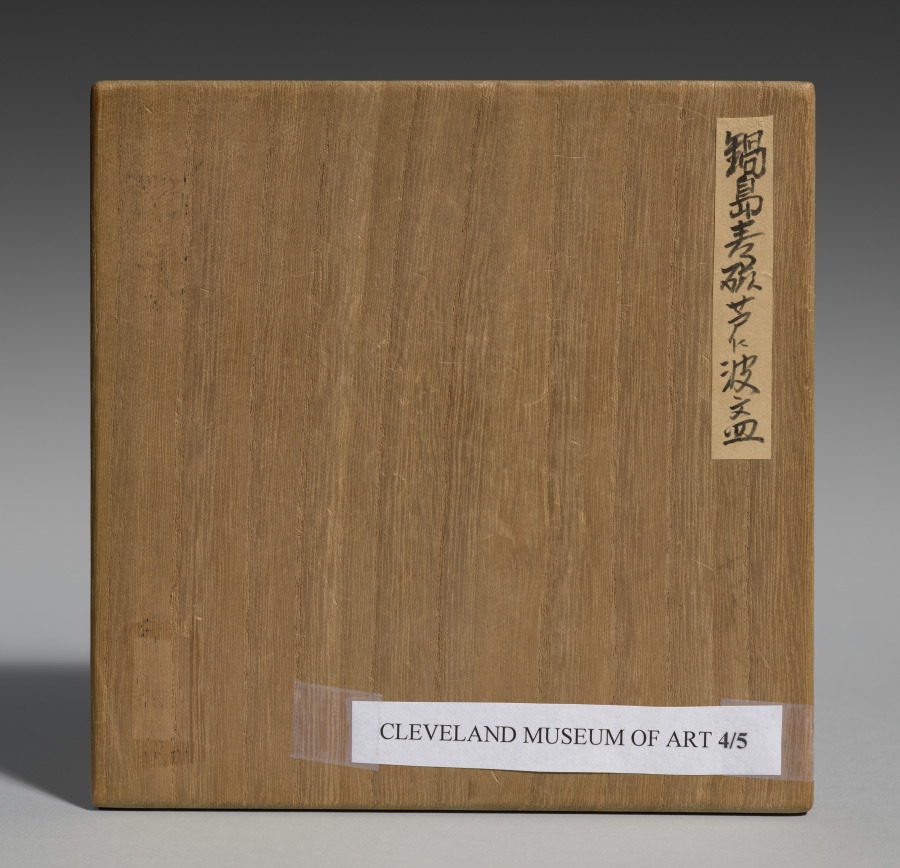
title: Small Dish (Kozara) with Waves and Reeds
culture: Japan, Edo period (1615–1868)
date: late 1600s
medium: Porcelain with underglaze blue and celadon (Hizen ware, Nabeshima type)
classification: Ceramic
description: This dish has a green glaze often called celadon in English.